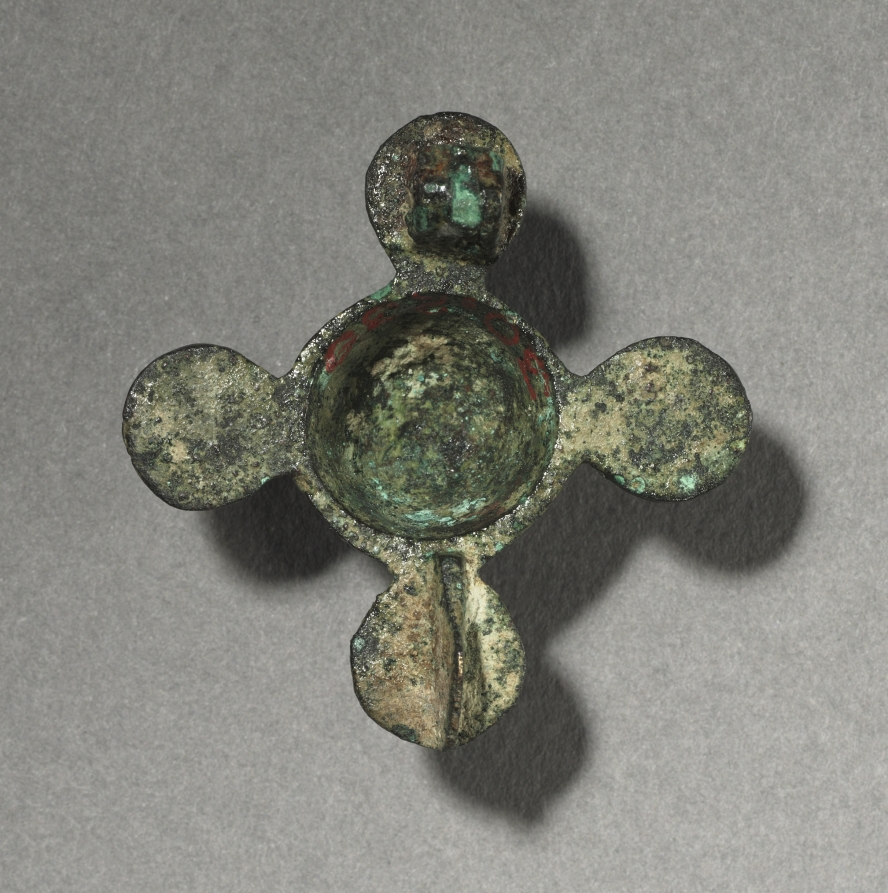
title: Ornamental Brooch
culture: Gallo-Roman or Romano-British, Migration period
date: c. 100–300 CE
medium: bronze and enamel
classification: Jewelry